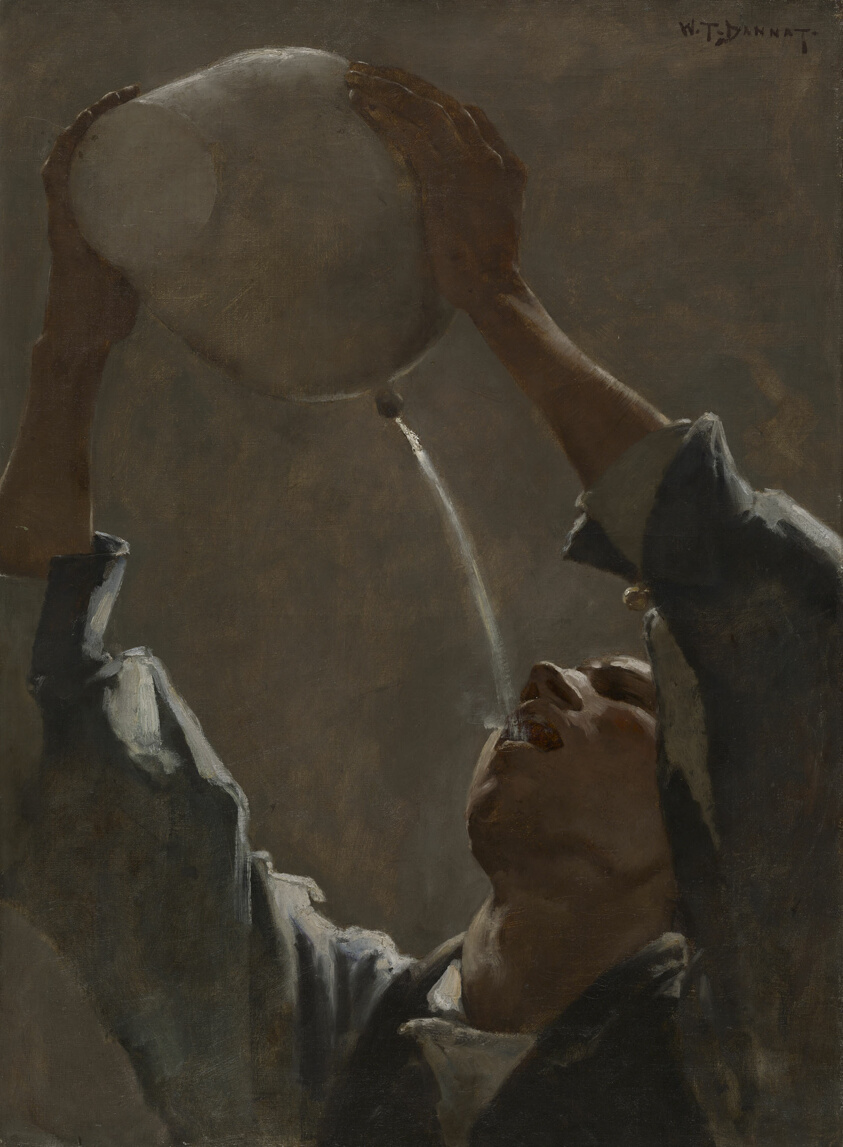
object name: Painting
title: Study for "An Aragonese Smuggler"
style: Realism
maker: William Turner Dannat (American, 1853–1929)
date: 1881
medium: Oil on canvas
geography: United States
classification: painting; american arts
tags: Chicago, dining, drinking